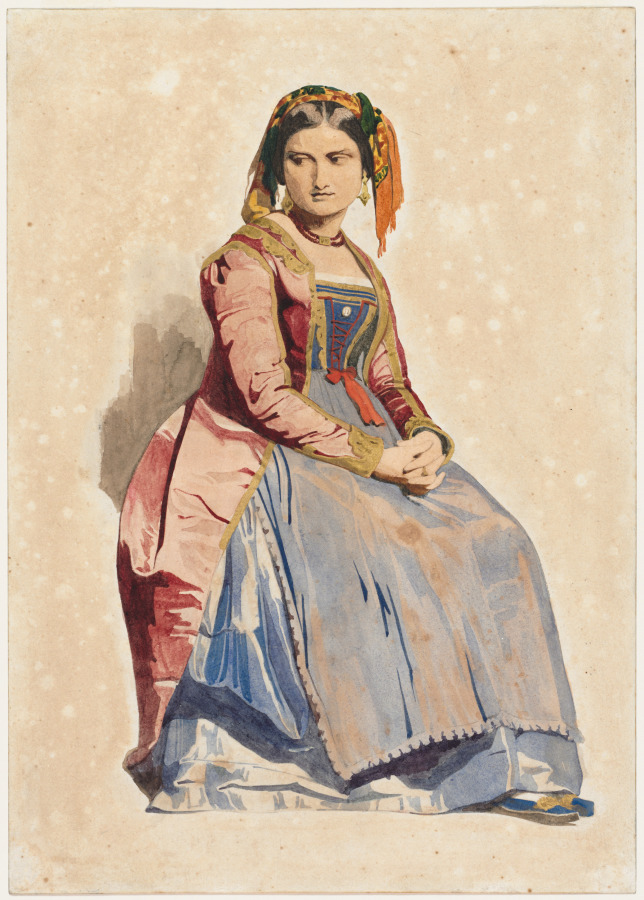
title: Seated Italian Woman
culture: France, 19th century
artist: Dominque Louis Papety (French, 1815–1849)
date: 1800s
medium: watercolor with gold paint with traces of graphite underdrawing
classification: Drawing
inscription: Inscribed on verso in graphite: PAPETY cf RF 827 au Louvre [in Louis-Antoine Prat's handwriting]